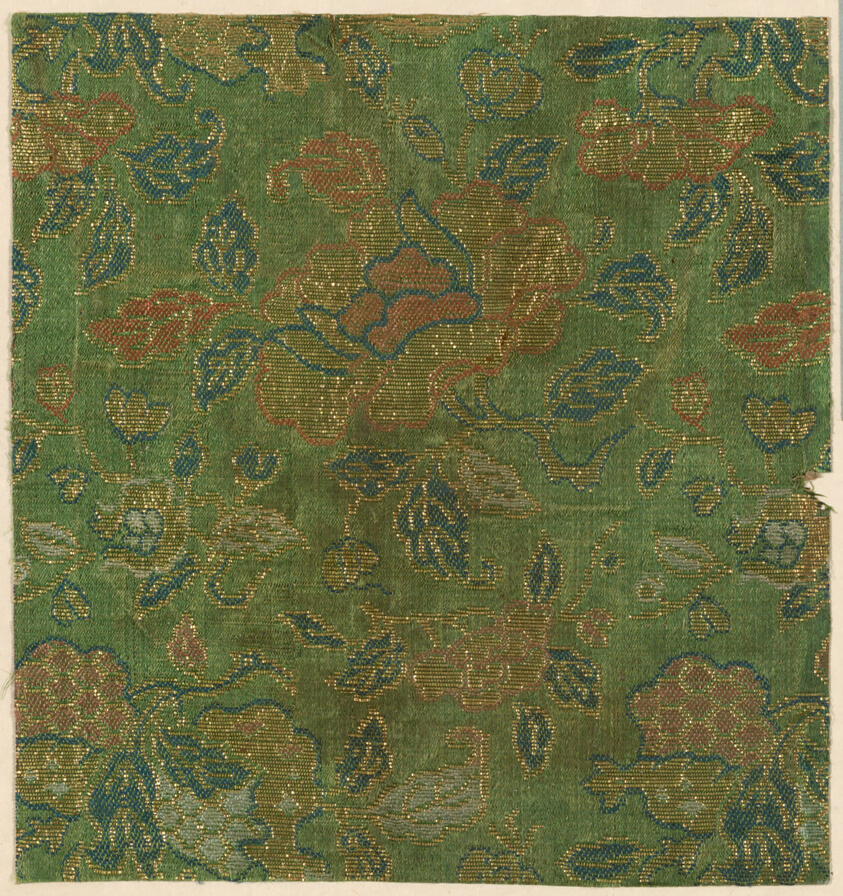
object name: Textile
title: Fragment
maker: Japan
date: 18th/19th century, Edo period (1615–1868)/ Meiji period (1868–1912)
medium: Plain compound twill, silk & gilt paper; 2 strips to m.m.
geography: Japan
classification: textile; weaving